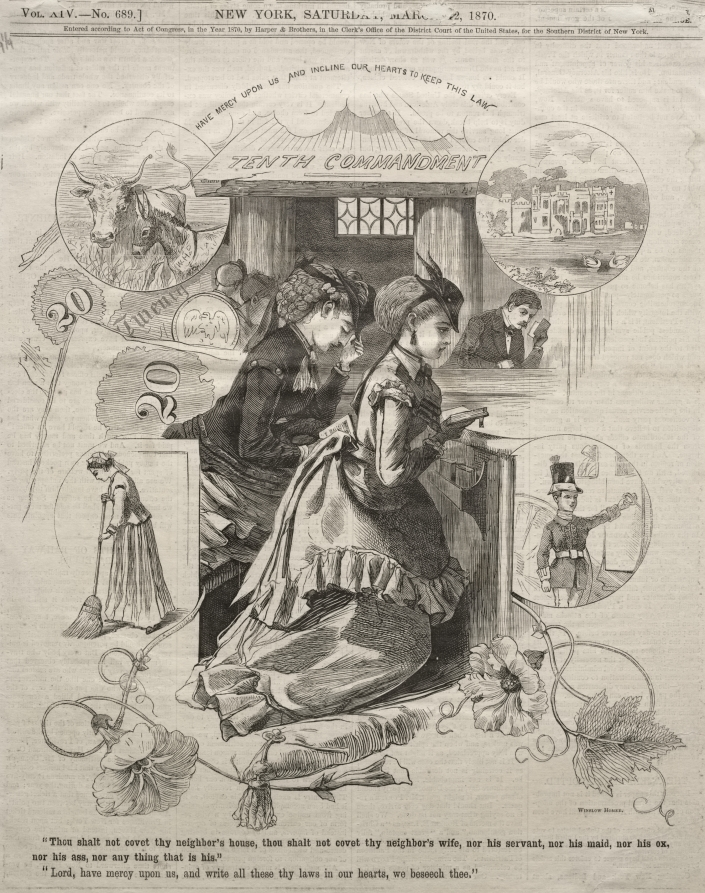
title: Tenth Commandment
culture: America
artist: Winslow Homer (American, 1836–1910)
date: 1870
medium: wood engraving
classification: Print